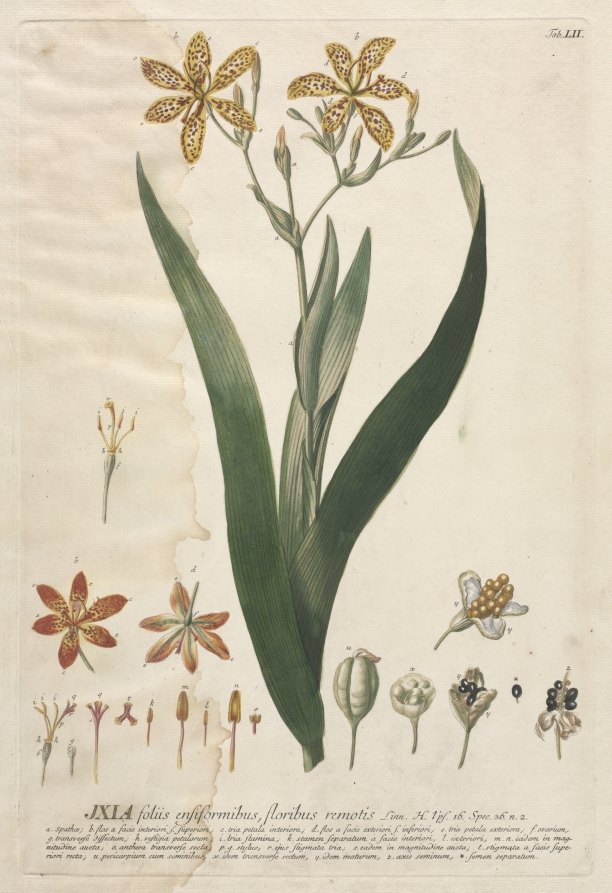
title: Plantae Selectae: No. 52 - Ixia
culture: Germany, 18th century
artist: Georg Dionysius Ehret (German, 1708–1770)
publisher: Christopher Jacob Trew (German, 1695–1769)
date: published 1750–73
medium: engraving, hand-colored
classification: Print